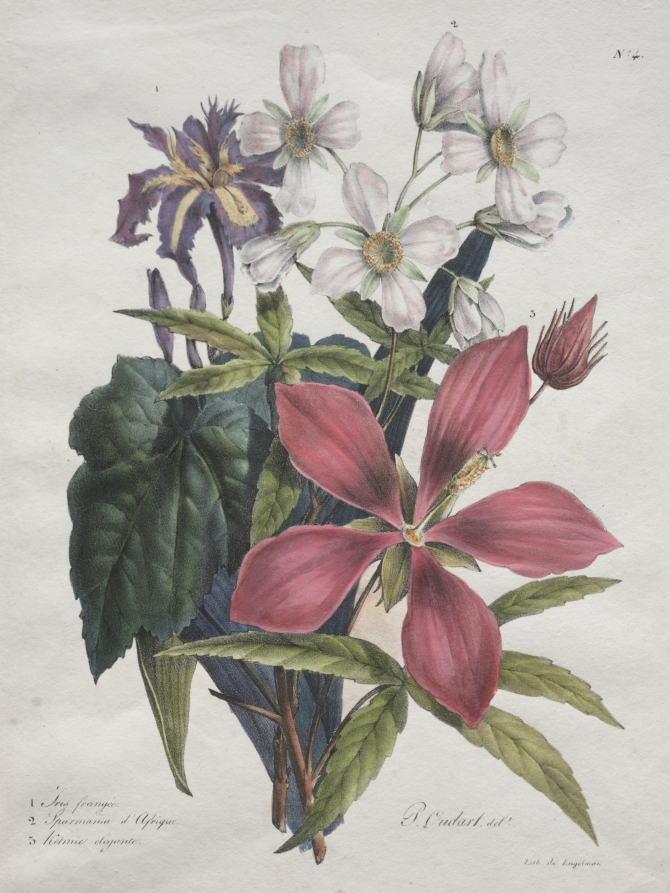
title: Cours d'Histoire Naturelle, contenant les principales espèces du règne animal, classées methodiquemenet: Iris, African-hemp and Ketmia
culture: France, 19th century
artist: Godefroy Engelmann (French, 1788–1839)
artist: after Paul Oudart (French, 1796–1860)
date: 1825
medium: lithograph, hand colored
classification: Print